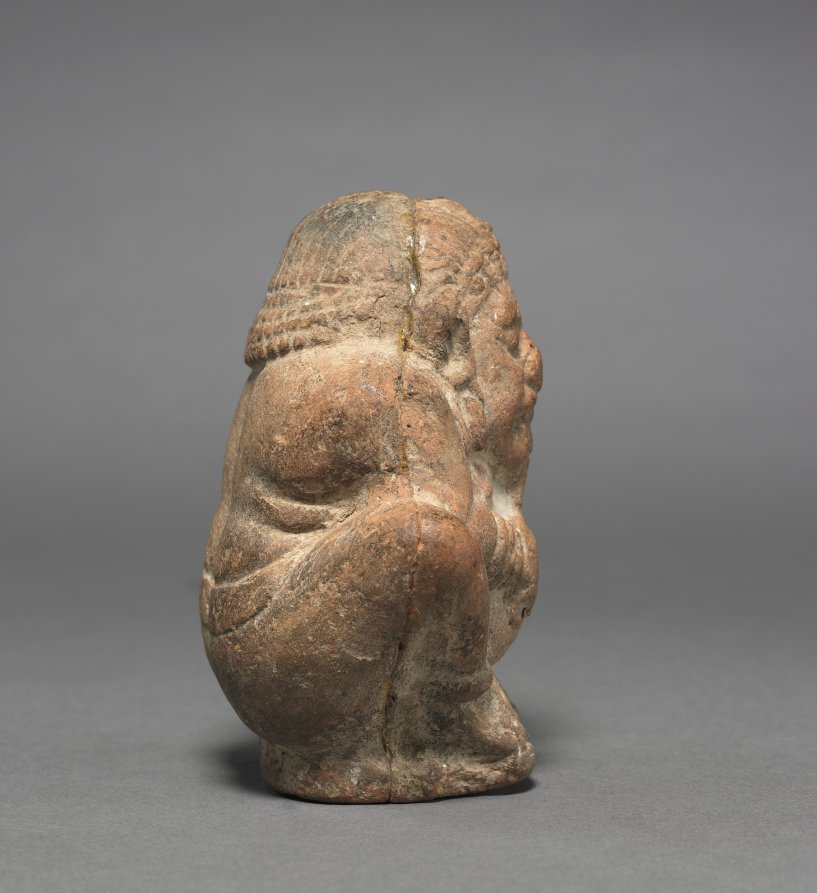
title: Crouching Dwarf Musician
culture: India, Shunga period (185–78 BCE)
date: 200–100 BCE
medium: terracotta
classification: Sculpture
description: Images of dwarfs referenced the fertility of the earth. With lush curling hair, portly full body, and visible genitals, this figure squats close to the earth and plays on a double flute pipe instrument.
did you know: Two holes at the top and bottom of the figure indicate that this object worked as a whistle.